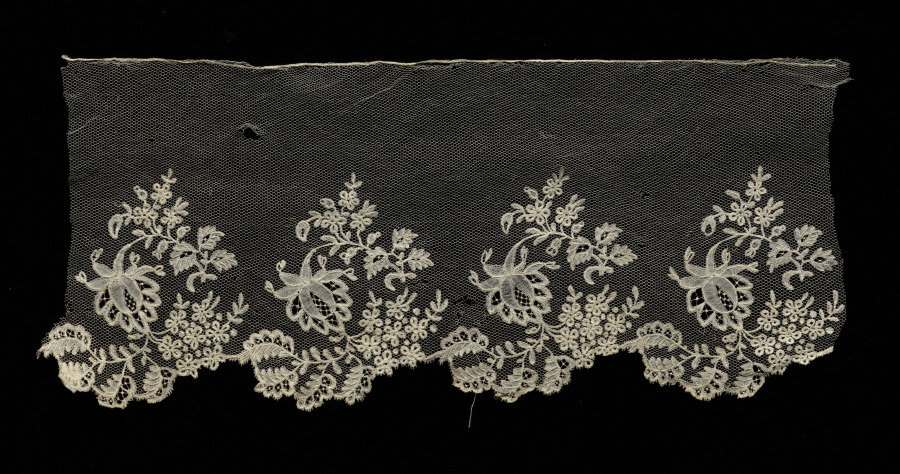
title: Lace Flounce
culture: Belgium, Brussels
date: 1800s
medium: Bobbin lace (point plat appliqué) applied to machine-made net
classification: Lace